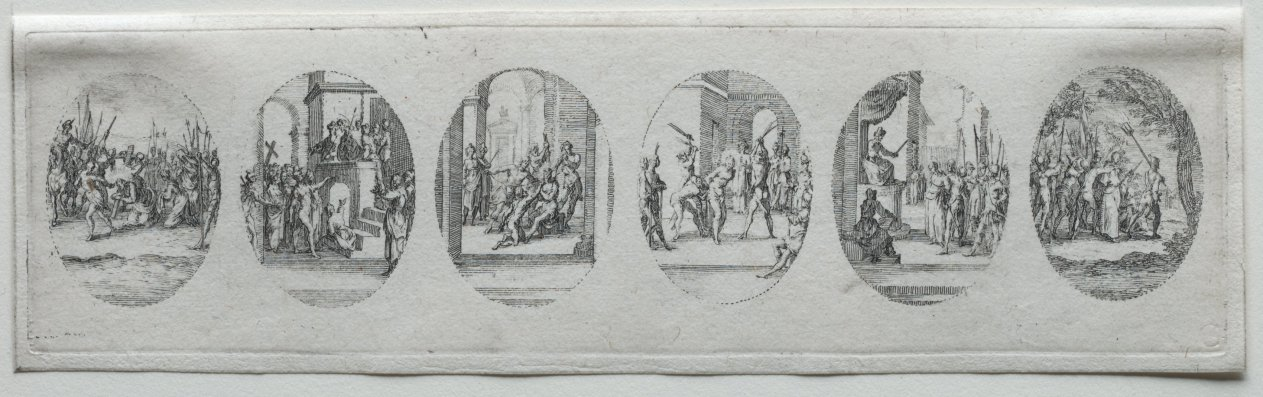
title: The Mysteries of the Passion: Christ Presented to the People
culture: France, 17th century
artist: Jacques Callot (French, 1592–1635)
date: 1631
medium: etching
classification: Print